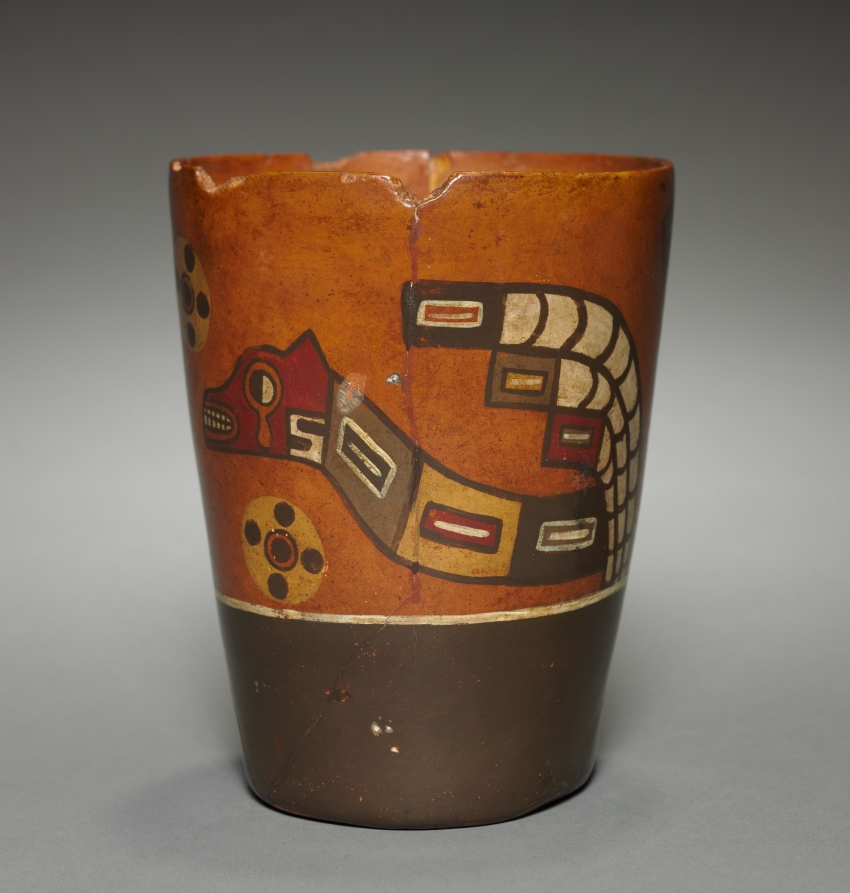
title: Kero-shaped Vessel (modern version of a Wari-style vessel)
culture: Peru, modern, 20th century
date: before 1955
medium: pottery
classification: Forgery